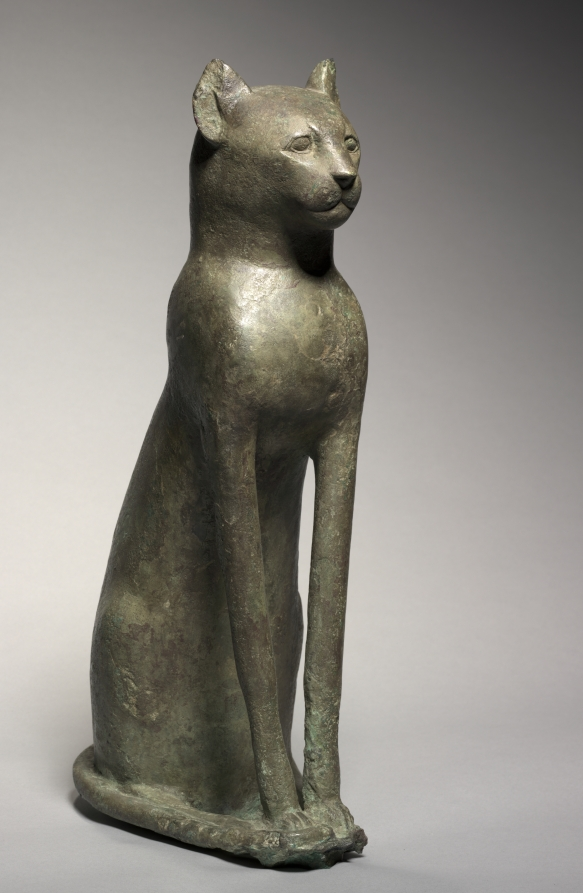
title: Cat Coffin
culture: Egypt, Greco-Roman period (332 BCE–395 CE), Ptolemaic dynasty (305–30 BCE)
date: 305–30 BCE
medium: bronze, hollow cast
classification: Funerary Equipment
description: Although the cat is considered the most Egyptian of animals, as an object of worship the cat does not appear until late in Egyptian history. This unusually large statue of a cat was made to hold the mummified remains of a sacred cat. The coffin is, of course, hollow, with an open bottom. As usual, the animal’s tail is curled around its right side.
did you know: A necklace appears to have been incised or scratched into the finished bronze; faint traces are visible on the chest.